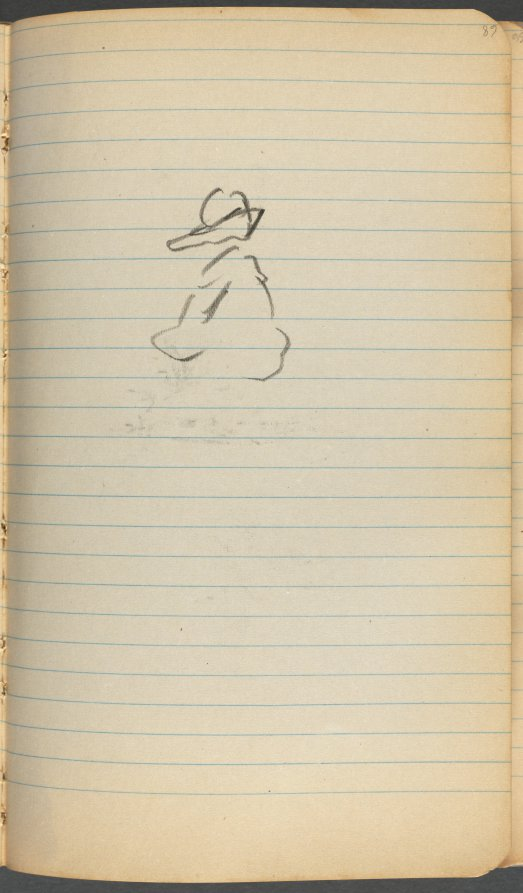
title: Sketchbook, page 068: Figure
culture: America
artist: Maurice Prendergast (American, born Newfoundland [now Canada], 1858–1924)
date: 1905–10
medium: graphite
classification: Bound Volume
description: This sketchbook contains 69 pages of drawings, a diary largely devoted to the state of the artist's health, and a three-page discourse on the nature of genius and ideas.